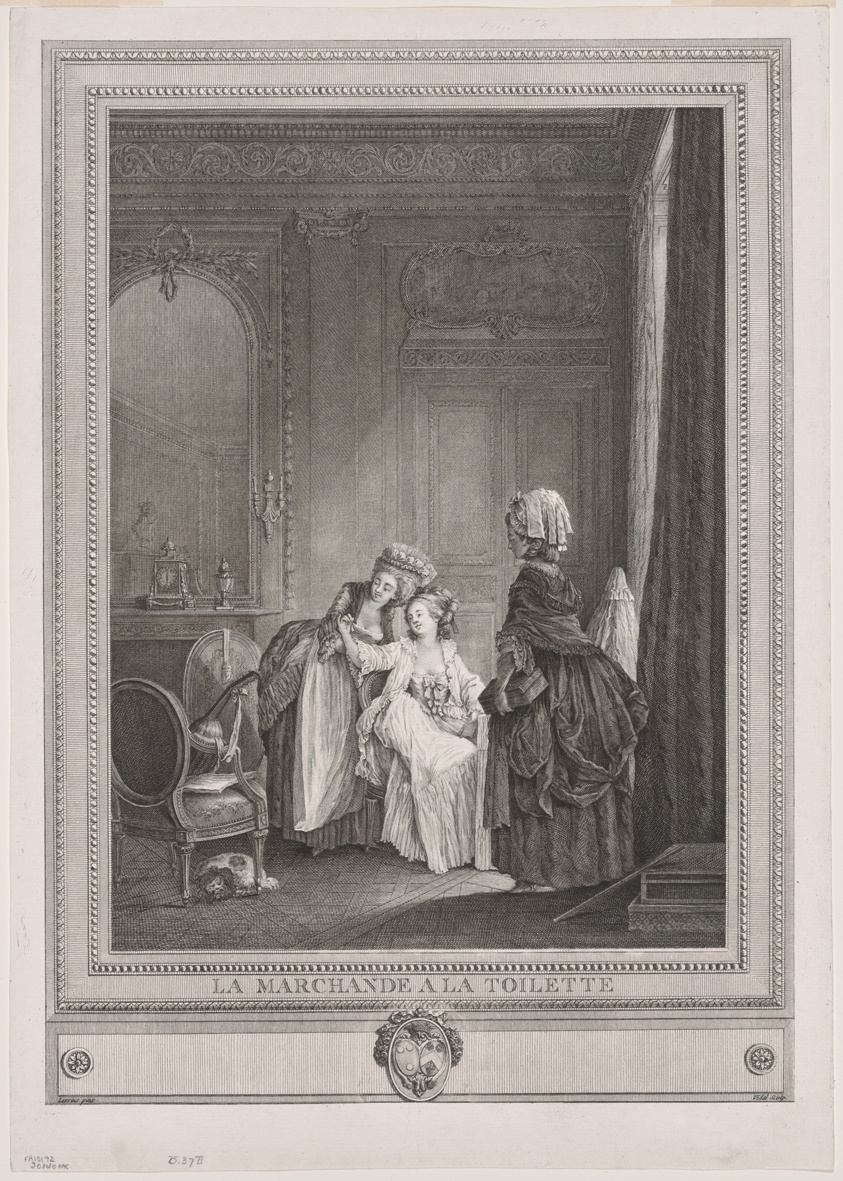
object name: Print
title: The Tradeswoman in the Dressing Room (La Marchande à la Toilette)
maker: Gérard Vidal (French, 1742-1801); after Nicolas Lavreince (Swedish, 1737-1807)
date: c. 1782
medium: Engraving with etching in black on ivory wove paper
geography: France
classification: prints and drawing; engraving; paper; print